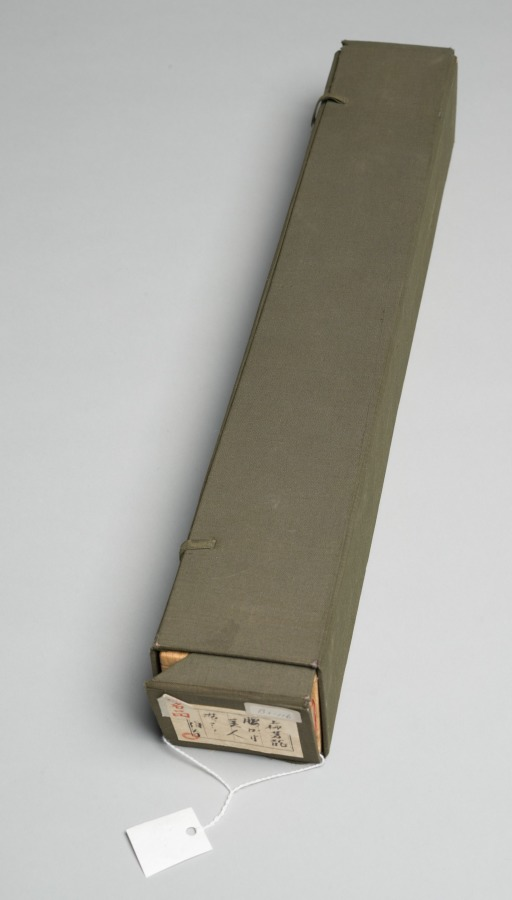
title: Courtesan Seated on a Bench Enjoying the Evening Cool in Summer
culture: Japan, Edo period (1615–1868)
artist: Kamigaki Hōryū (Japanese, dates unknown)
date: 1615–1868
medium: hanging scroll, ink and color on silk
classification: Painting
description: In a pensive pose with her chin resting in her hand, a courtesan is seated on a wooden bench that extends diagonally across the lower half of the scroll. Her open robe suggests that it is a warm evening-perhaps late summer or early fall, as indicated by the grapevine pattern on her kimono. The floral patterns in the composition hint at the seasons: the plum blossom on the fan for spring; grape pattern on the robe for late summer; and chrysanthemum design on the bench indicating autumn. Note also how the grapevine pattern in the painting's mounting mimics the design of her kimono. The overall mood is one of intimacy, created by Hõryþ through the delicate rendering of the courtesan's facial features and hands. In contrast to the other scrolls of beauties nearby, the artist here portrayed his subject with little background, allowing her grace and elegance to carry the picture.